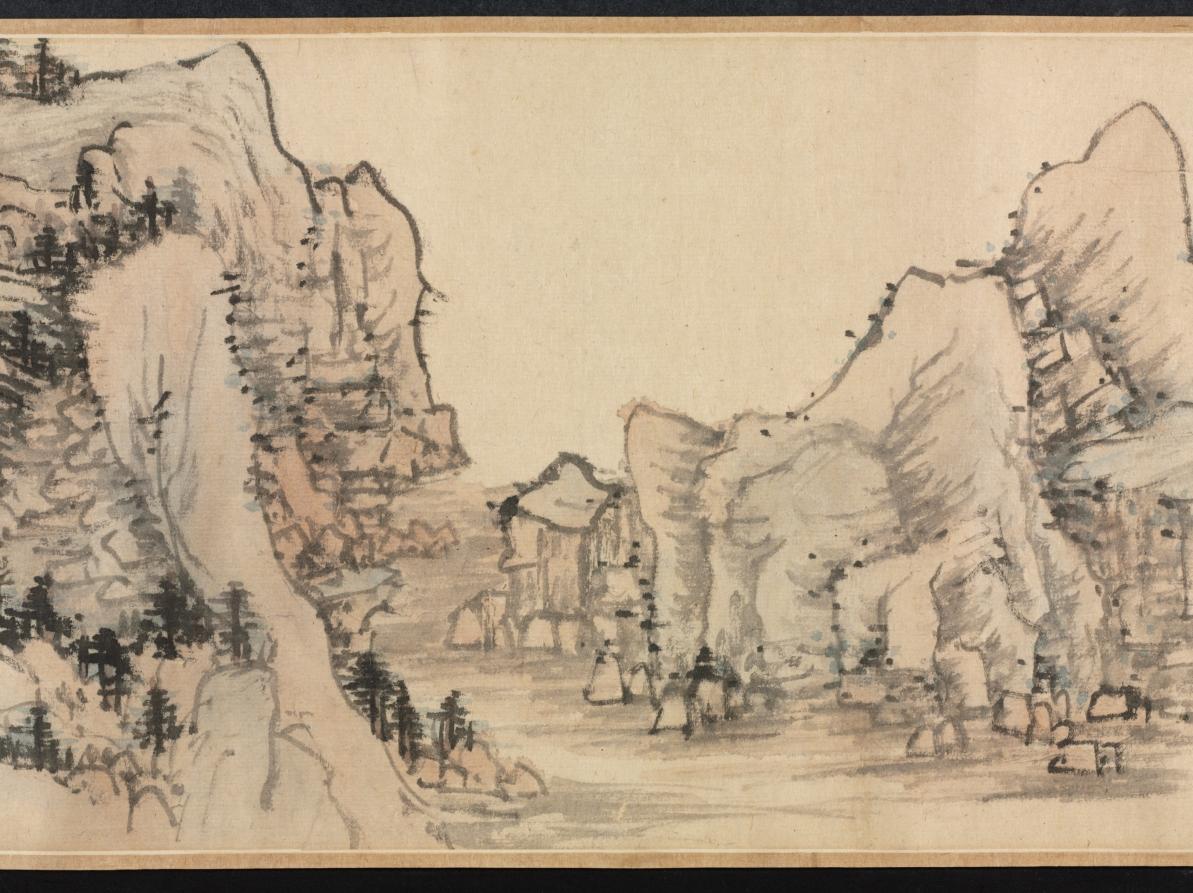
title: Dream Journey among Rivers and Mountains, no. 90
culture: China, Qing dynasty (1644-1911)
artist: Cheng Zhengkui (Chinese, 1604–1676)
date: 1658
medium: Handscroll; ink and color on paper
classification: Painting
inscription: 江山臥遊圖其九十, 青溪道人, 戊戌夏五。 [印] 程正揆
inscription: Title and inscription by Huang Yi 黃易 (1744–1802), and 3 seals.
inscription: 1 colophon and 9 additional seals: 3 seals of Dai Zhi 戴植 (active about 1821–1850); 1 colophon, dated 1914, and 3 seals of Yan Shiqing 顏世清 (1873–1929); 3 seals of Wang Nanping 王南屏 (1924–1985).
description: Cliffs and waterfalls interspersed with trees and dotted vegetation are spread over this handscroll. Long paths wind their way through villages, beside cottages, shrines, and over bridges. In the past, Chinese literati officials liked to take a “dream journey” along mountains and rivers when viewing landscape paintings in their studios. Scenery of this kind thus became a way to escape from the world of bureaucracy and administration. The painter Cheng Zhengkui used the title “Dream Journey” for a whole series of paintings, of which this is number 90. He is said to have painted 500 of them, but the actual count remains unknown.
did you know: Cheng Zhengkui planned to make 100 dream journey paintings but may have ultimately made 500.